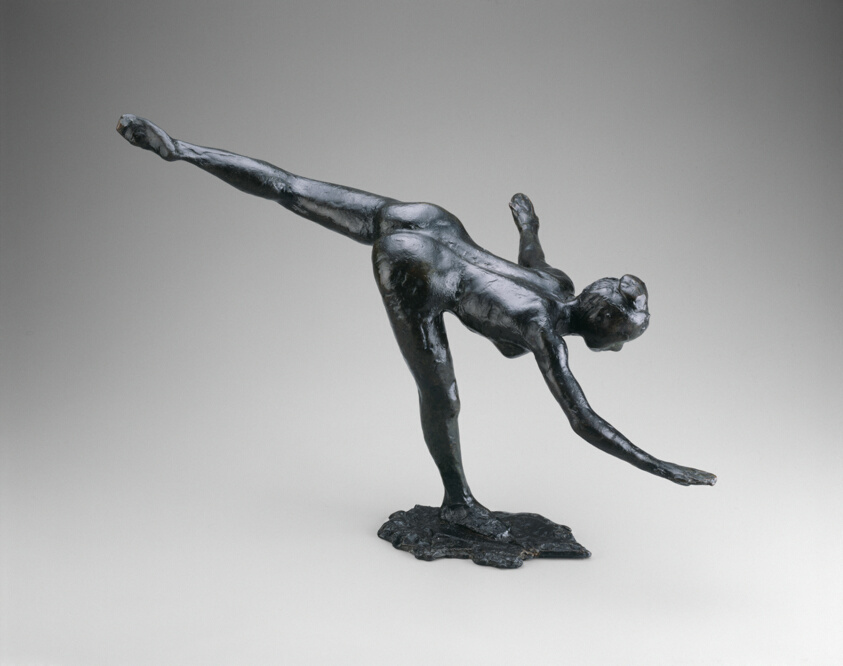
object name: Sculpture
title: Arabesque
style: Impressionism, nineteenth century, 19th century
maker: Edgar Degas (French, 1834–1917)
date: Modeled 1885/90, cast 1919/21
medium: Bronze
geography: France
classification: statuette; french; figure; sculpture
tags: dancers, ballet, women, Century of Progress, world's fairs, Chicago World's Fairs